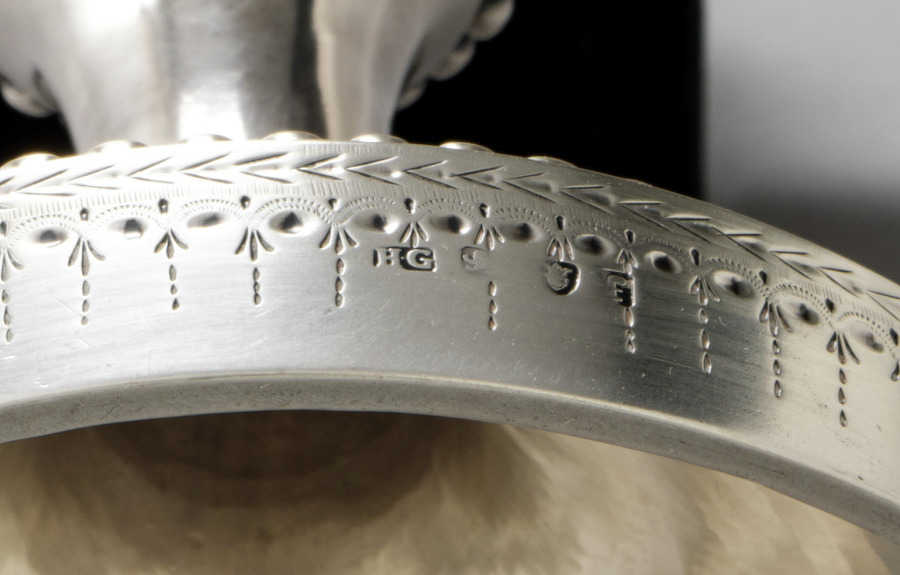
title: Tea Urn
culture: England, London, 18th century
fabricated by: Henry Greenway (British)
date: 1781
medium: silver and ivory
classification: Silver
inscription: engraved on body: coat of arms-- tower surrounded by three covered cups; crest consisting of a squirrel. Engraved on cover: crest consisting of a squirrel (coat of arms of Amcotts family).